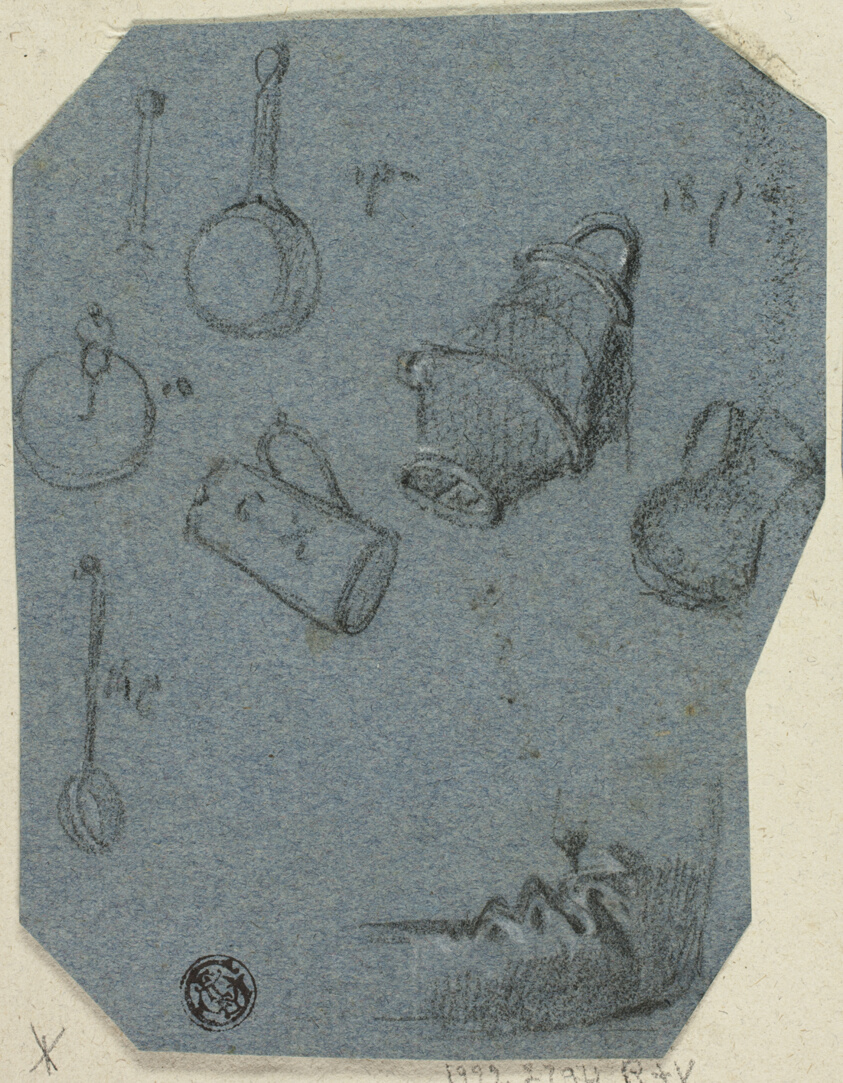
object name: Drawing and Watercolor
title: Sketches of Kitchen Utensils, Bent Arm (recto); Historical Scene (verso)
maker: Unknown Artist; British, 19th century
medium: Black chalk with stumping, heightened with traces of white chalk (recto and verso), on blue laid paper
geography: United Kingdom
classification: chalk; paper; drawings (visual works); prints and drawing